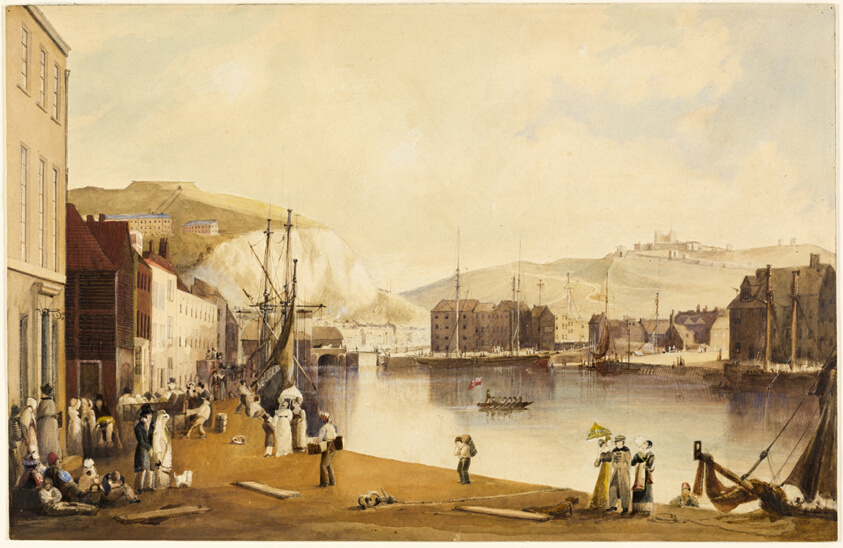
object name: Drawing and Watercolor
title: Dover Harbor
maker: John Gendall (English, 1790-1865)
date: c. 1820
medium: Watercolor and gouache, with pen and brown and black ink, over graphite, heightened with gum arabic, on cream laid paper, laid down on ivory card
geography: England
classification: watercolor; drawings (visual works); prints and drawing